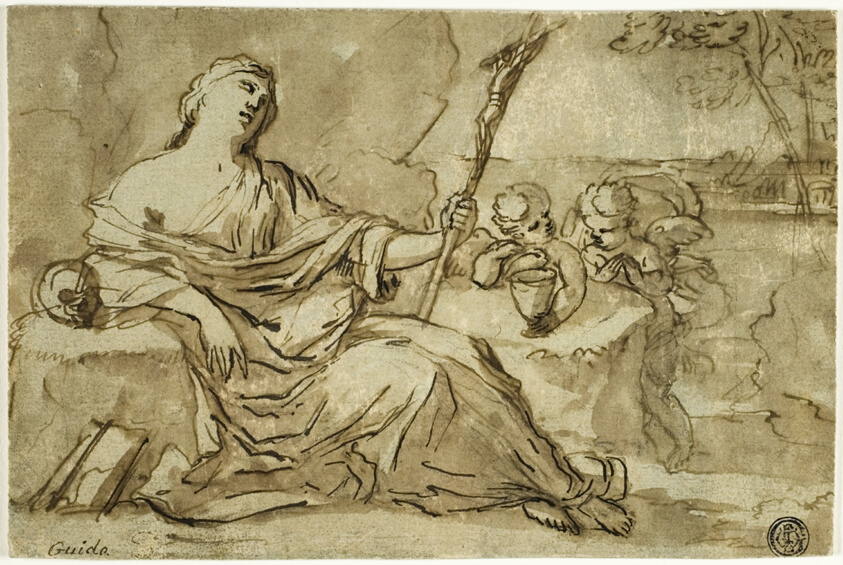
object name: Drawing and Watercolor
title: Magdalene in the Wilderness with Two Putti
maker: François Perrier (French, 1590-1650); after Guido Reni (Italian, 1575-1642)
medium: Pen and brown ink, with brush and brown wash, over black chalk, on blue tinted laid paper, laid down on card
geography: France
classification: pen and ink drawings; drawings (visual works); prints and drawing